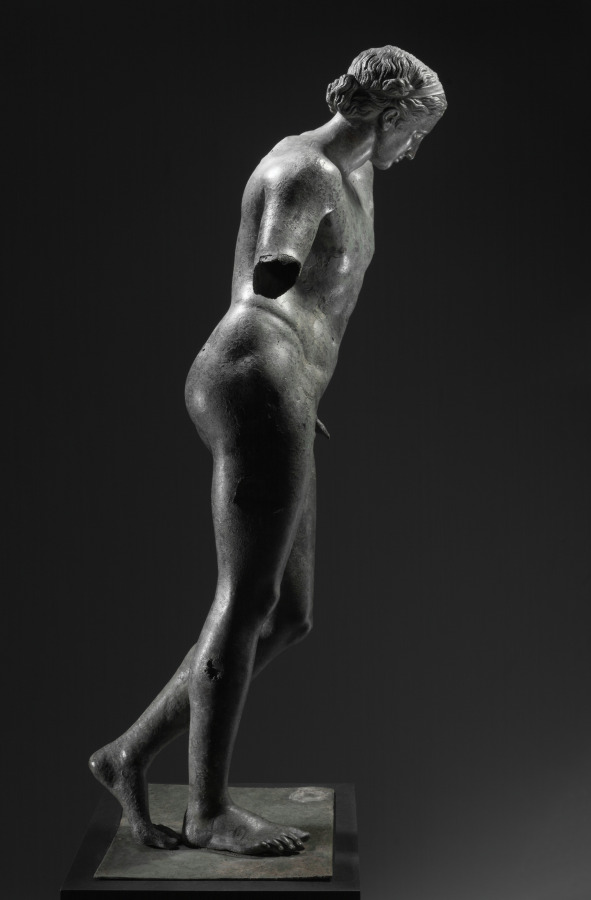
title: The Cleveland Apollo: Apollo Sauroktonos (Lizard-Slayer) or Apollo the Python-Slayer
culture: Greece, Athens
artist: attributed to Praxiteles (Greek, Athenian, c. 400–330 BCE)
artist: or Follower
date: c. 350–200 BCE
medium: bronze, copper and stone inlay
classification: Sculpture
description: The Cleveland Apollo was cast in multiple sections using the indirect lost-wax technique. First, molds were taken from a working model (now no longer known or preserved), which was then reproduced in hollow wax sections, each filled with a clay core. After details were added to the wax models, each was encased in clay. Then, the wax was heated, melted out, and replaced by molten bronze. Once cooled, the hollow bronze sections were fused together and finished, patching flaws and adding inlays and other details. Since the initial model was retained, it could be reused, allowing ancient sculptors to create multiples and variations of favorite works. Thus, remarkably, the Cleveland Apollo may once have been one of several such works. The consistently thin walls of the Cleveland Apollo (mostly 5-6 mm thick), together with the nearly invisible joins between most cast sections, show that it was created by highly skilled sculptors and foundry workers. Close looking reveals several noteworthy features. First, ovals atop the right foot mark a fusion weld, where molten bronze pooled to join separately cast sections. Second, small rectangular bronze patches cover parts of the surface (especially the right hip), each carefully cut and then hammered into place over holes or other casting defects. Inlaid lips, nipples, and eyes (the right ancient stone, the left now a modern replacement) added to the lifelike appearance of the sculpture, contrasting with the once bronze-colored skin. Finally, radiography helps to illuminate hidden features, such as the cast edge of the neck of Apollo.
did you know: Ovals across the top of the right foot show a clear join between separately cast sections.